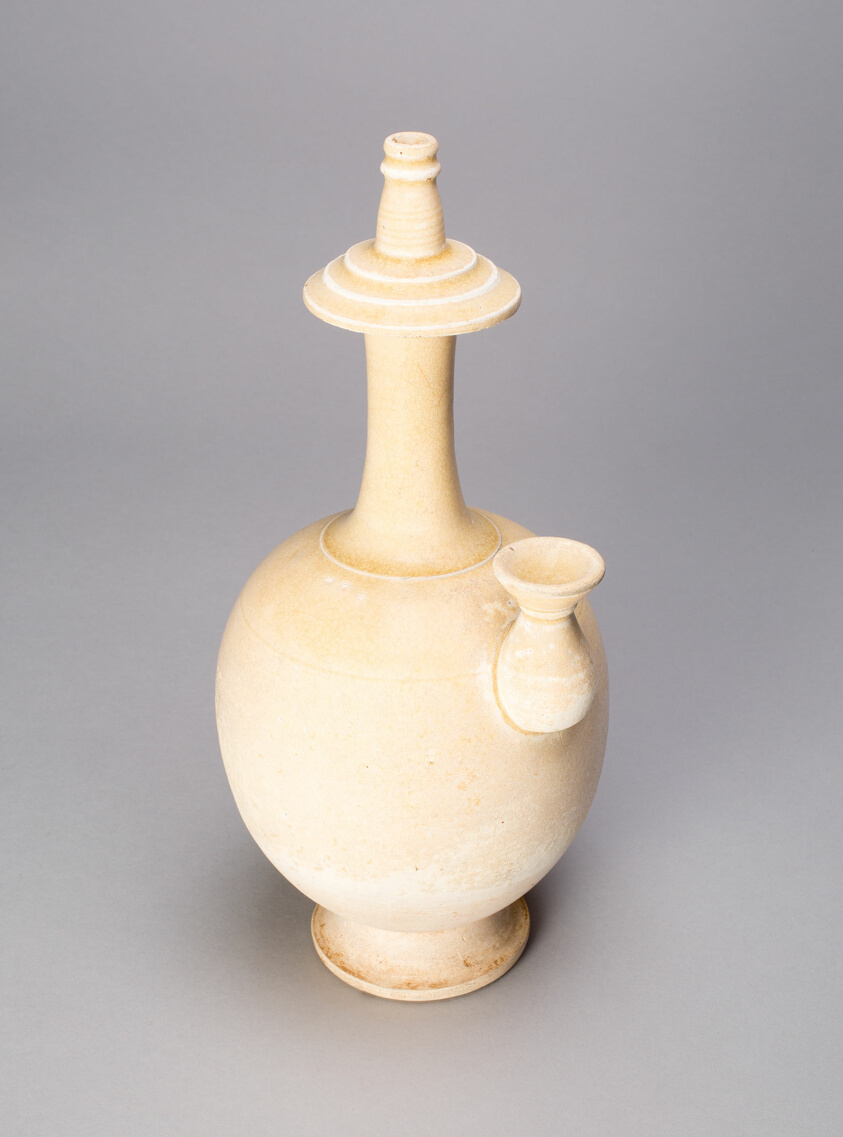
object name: Vessel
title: Buddhist Water Sprinkler (Kundika)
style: Chinese (culture or style)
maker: China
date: Tang dynasty (618–907), 7th century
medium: Slip-coated stoneware with creme glaze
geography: China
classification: stoneware; ceramics; asian art; vessel